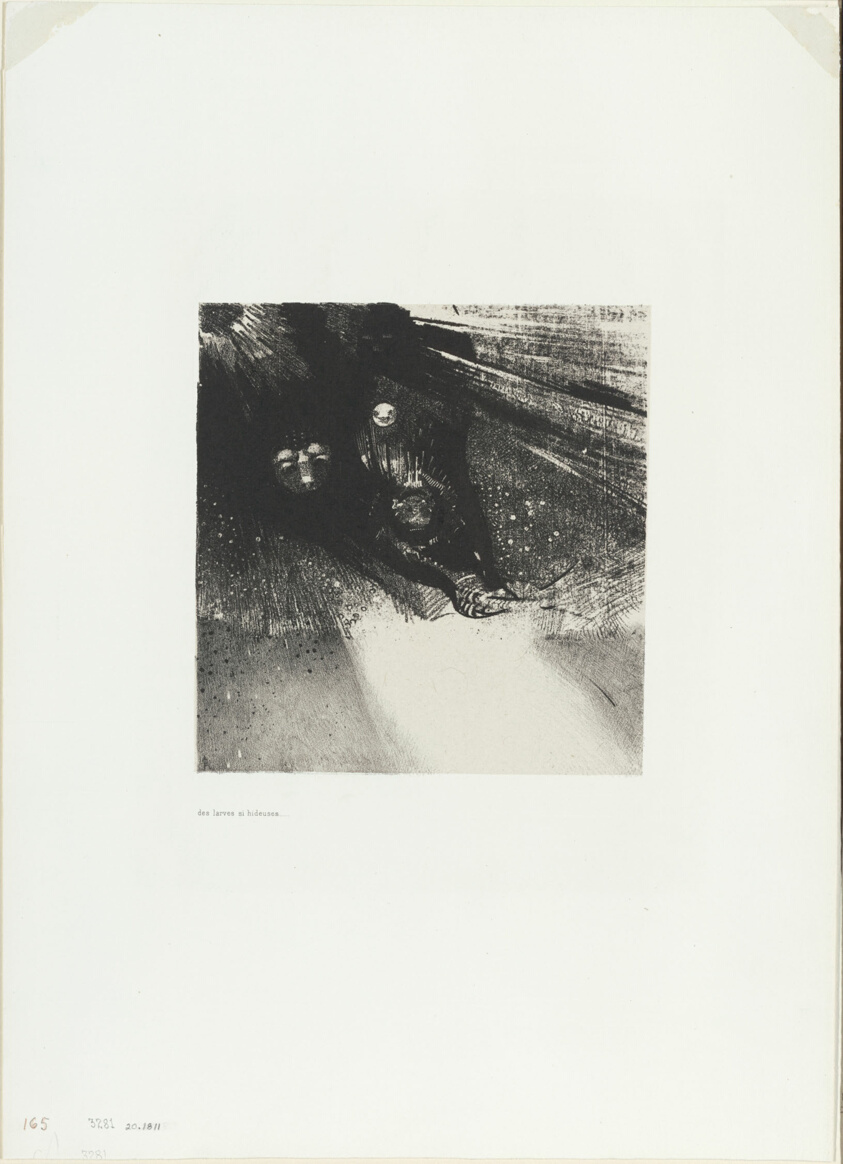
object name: Print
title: Larvae So Bloodless and So Hideous, plate 5 of 6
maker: Odilon Redon (French, 1840-1916)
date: 1896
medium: Lithograph on ivory chine laid down on white wove paper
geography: France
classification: lithograph; print; prints and drawing; paper